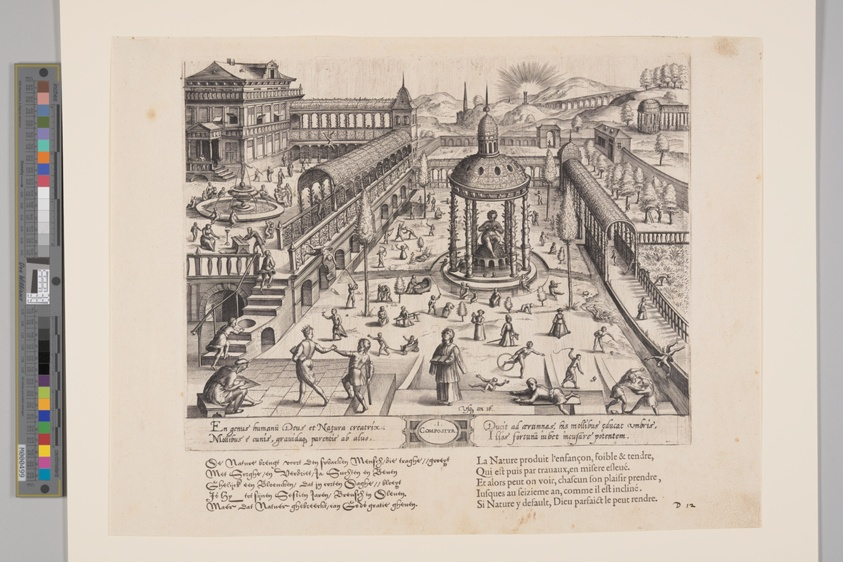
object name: Print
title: Composita,from Theatrum Vitae Humanae (The Ages of Man)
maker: Jan Wierix (Flemish, 1549–c. 1618)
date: 1577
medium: Engraving on ivory laid paper, with letterpress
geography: Flanders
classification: engraving; paper; print; prints and drawing